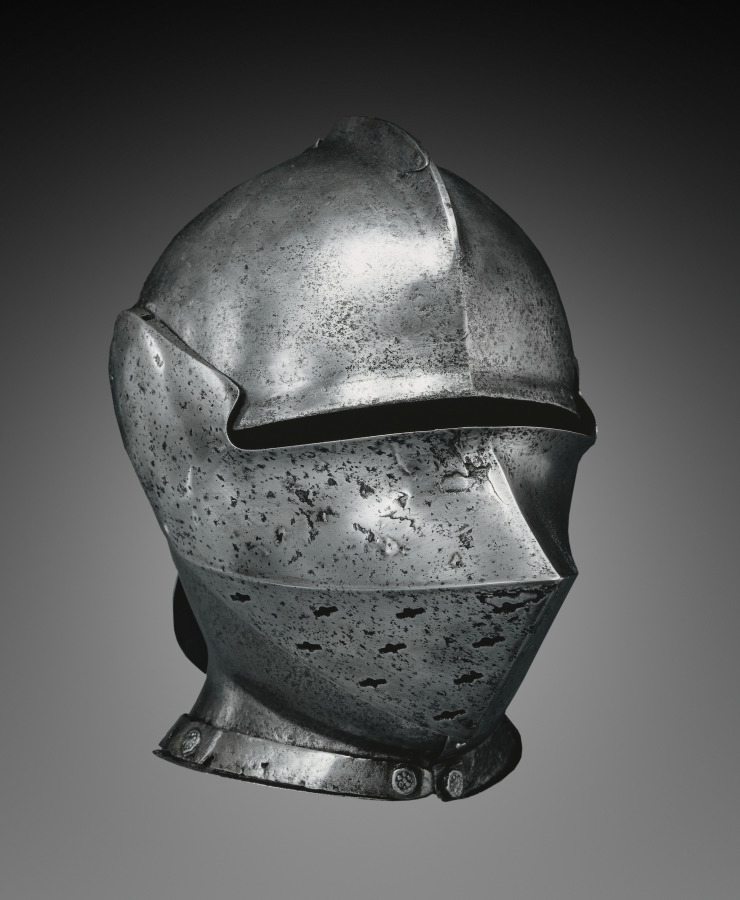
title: Armet à Rondelle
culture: Italy, Milan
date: c. 1460–75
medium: steel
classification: Arms and Armor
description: The armet is a visored helmet with cheekpieces that fasten at the chin. The "rondelle" is the disc at the back of the neck. Its purpose was to protect the point where the two cheekpieces join at the back. This style of helmet was the typical headpiece of the fully armored equestrian knight throughout most of the 1400s.